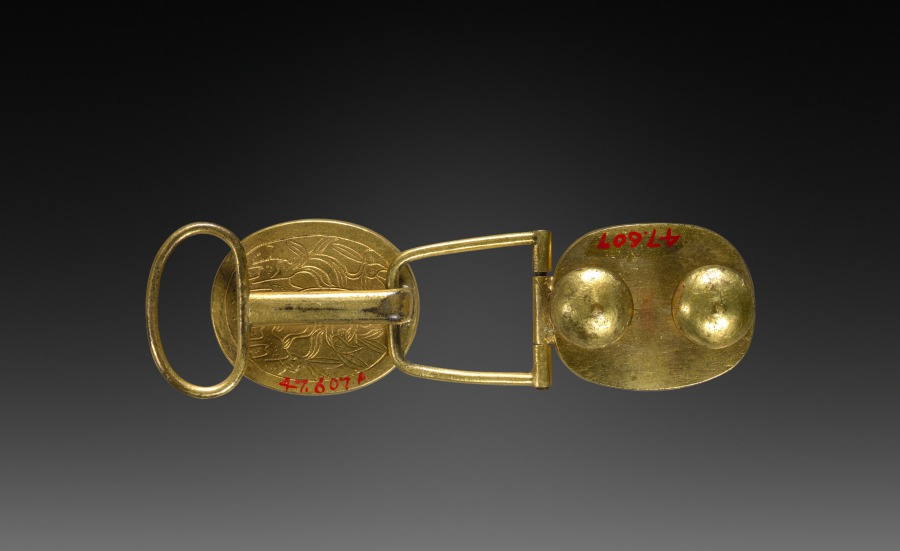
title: Buckle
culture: China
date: 1900s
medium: rose quartz and glass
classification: Jewelry